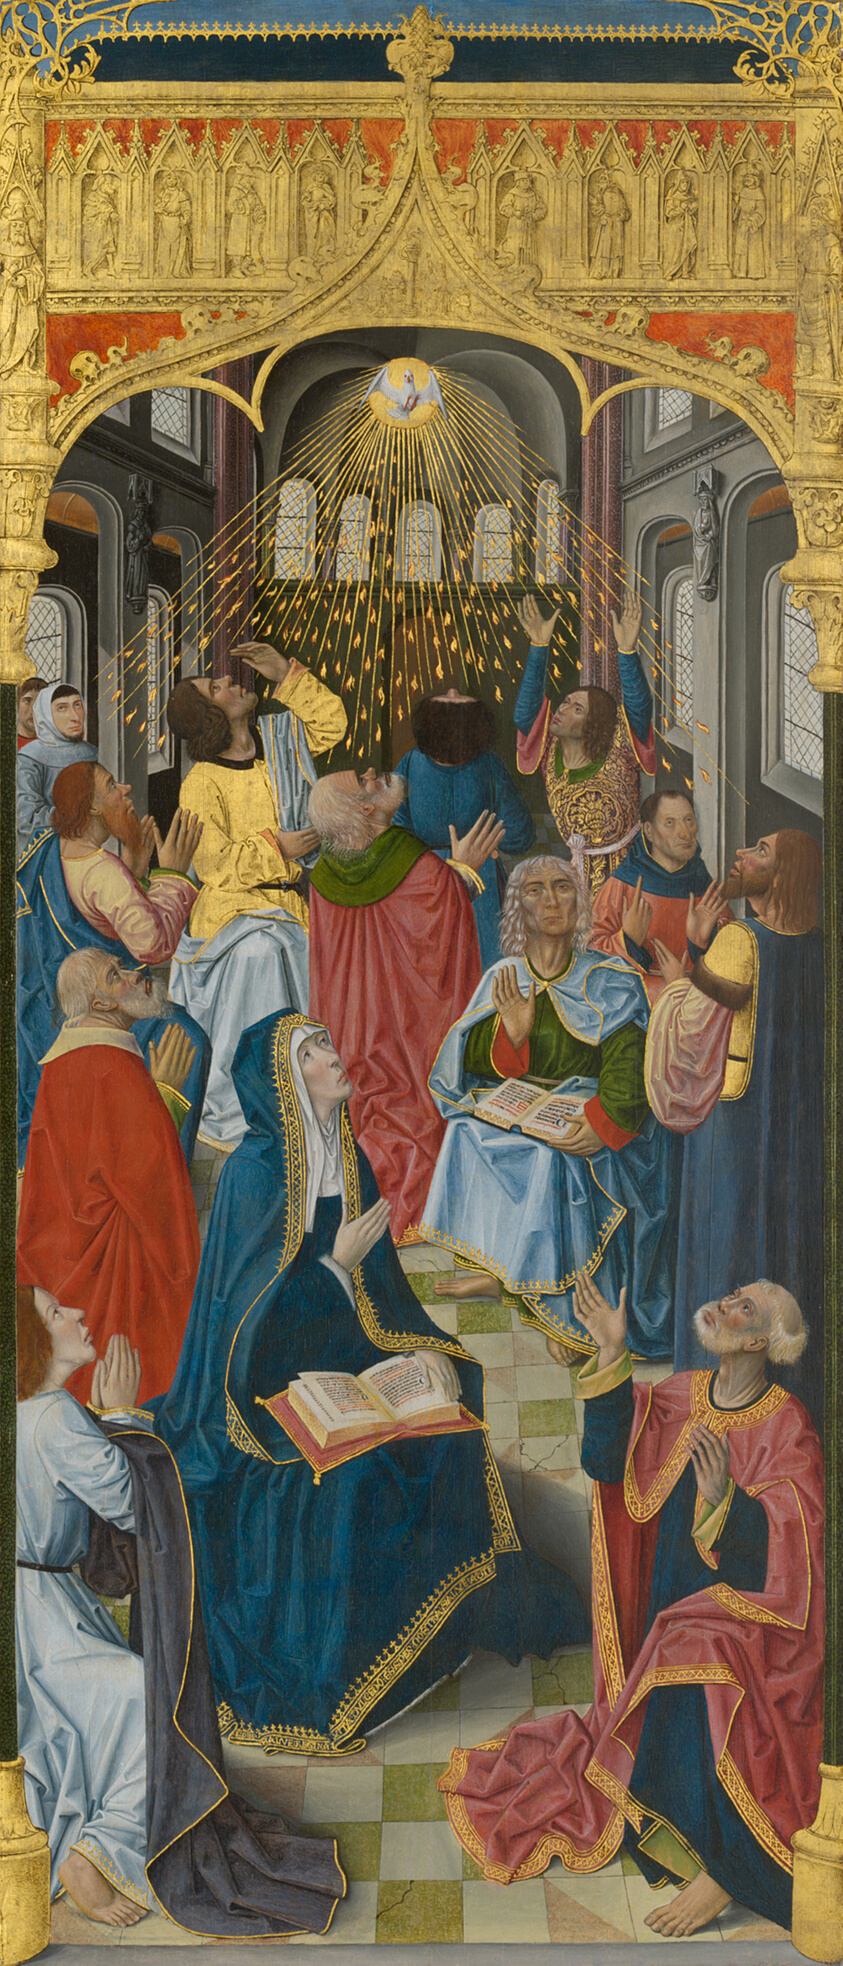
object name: Painting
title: Panels from the High Altar of the Charterhouse of Saint-Honoré, Thuison-les-Abbeville: Pentecost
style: 15th century, sixteenth century, 16th Century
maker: French; Picardy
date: c. 1495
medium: Oil on panel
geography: France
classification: oil on panel; paint; oil paintings (visual works); french; painting; european painting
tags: Christian subjects, architecture, architecture, architechture, biblical, religious figures, religious scenes, religious, religion, Christianity, Virgin Mary, men, bird, doves, saints, Century of Progress, world's fairs, Chicago World's Fairs